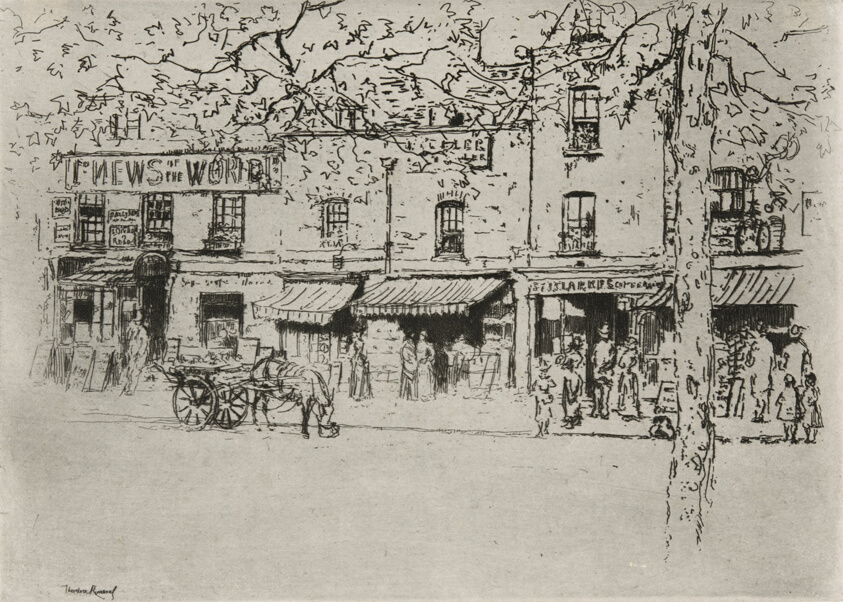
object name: Print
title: The Street, Chelsea Embankment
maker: Theodore Roussel (French, worked in England, 1847-1926)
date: 1888–89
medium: Etching in black on ivory wove paper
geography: England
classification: etching; paper; print; prints and drawing